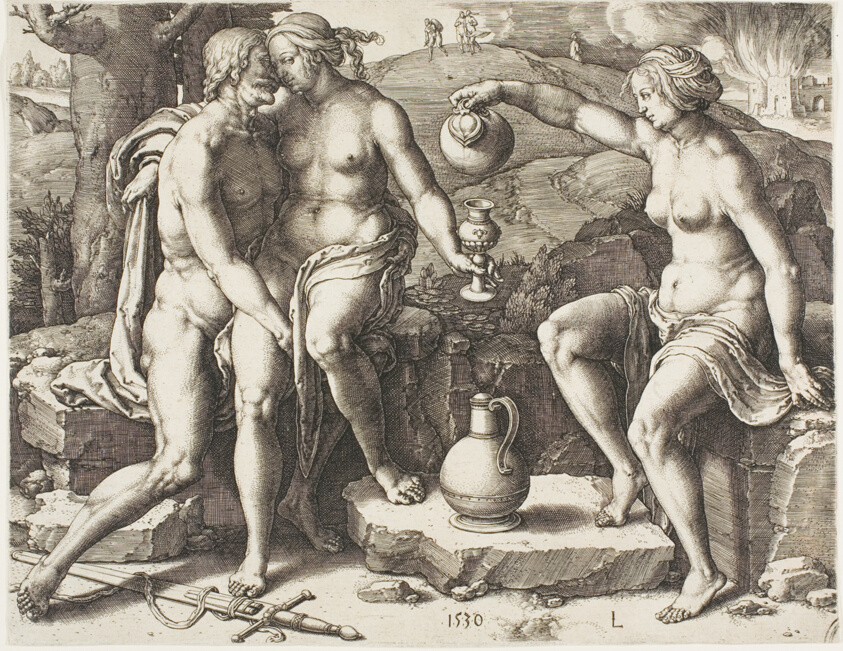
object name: Print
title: Lot and his Daughters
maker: Lucas van Leyden (Netherlandish, c. 1494-1533)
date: 1530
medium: Engraving in black on ivory laid paper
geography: Netherlands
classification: engraving; print; prints and drawing